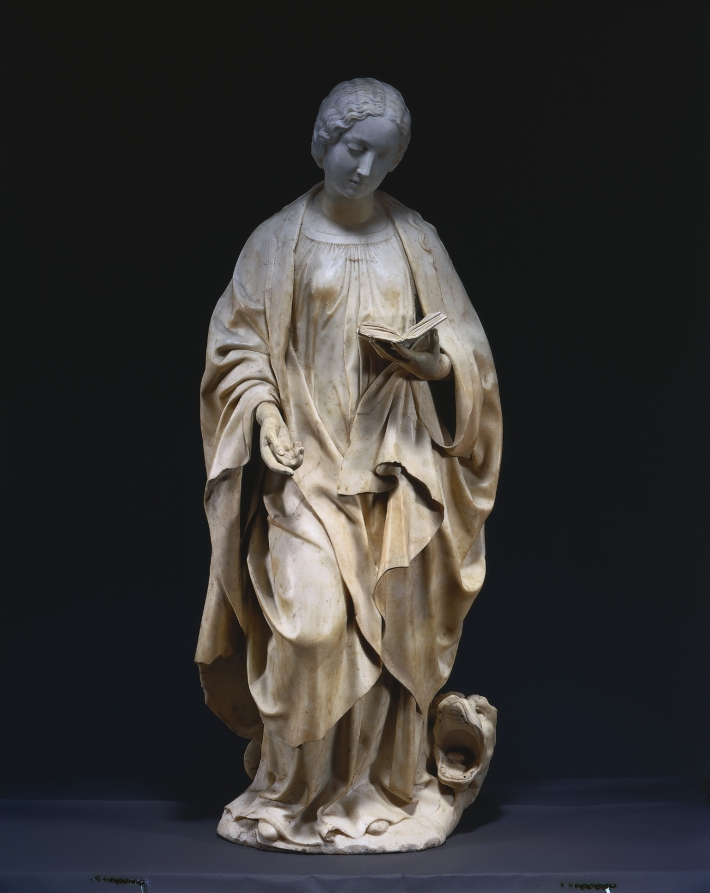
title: Saint Margaret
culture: Italy, Sicily, Palermo, 16th century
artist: Antonello Gaggini (Italian, 1478–1536)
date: c. 1520–1530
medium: marble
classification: Sculpture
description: Gaggini was a member of a large family of sculptors whose Palermo workshop supplied monumental religious sculptures for the cathedrals of Palermo and Messina in Sicily and Montelione in Calabria. After 1507 Antonello himself worked for 15 years to produce marble sculptures for Palermo Cathedral. This figure of the legendary virgin martyr, Saint Margaret, was probably commissioned for one of these ecclesiastical foundations, possibly the chancel of Palermo Cathedral. The saint is shown reading from a book of hours (a sign of her piety) and trampling upon a dragon, the symbol of Satan. The dragon became the attribute by which she is recognized in sacred art.